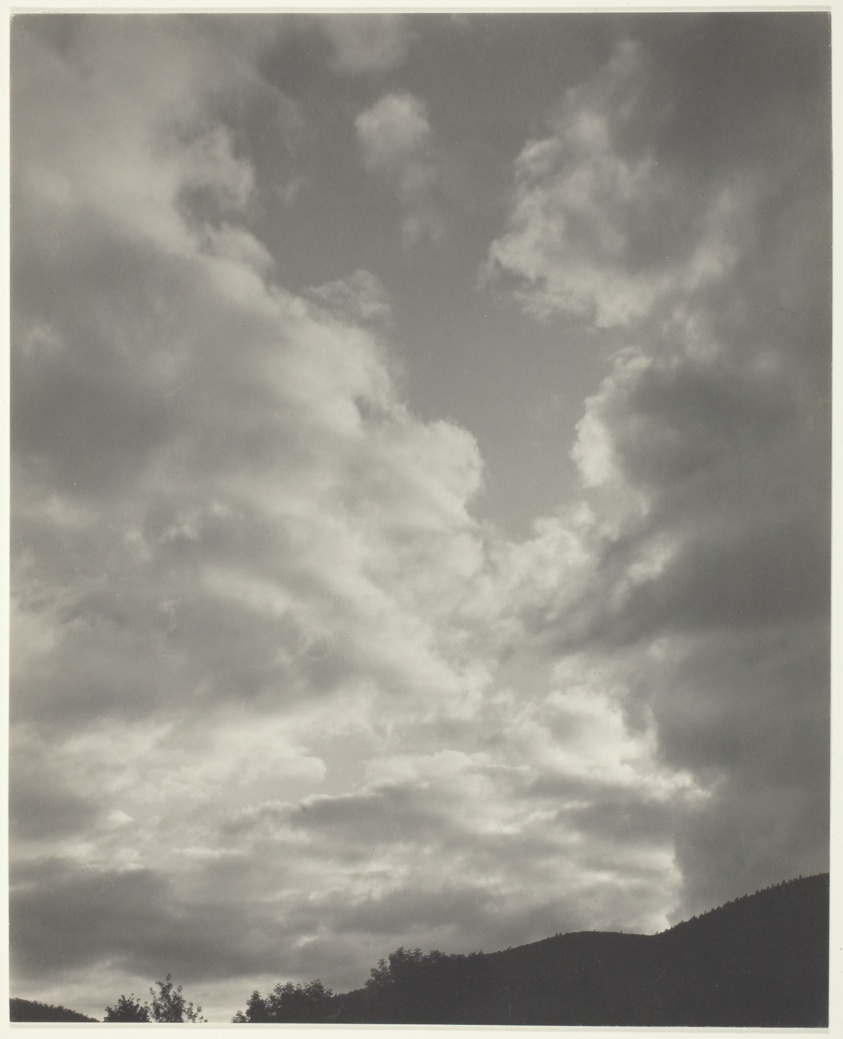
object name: Photograph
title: Music - A Sequence of Ten Cloud Photographs, No. II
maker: Alfred Stieglitz (American, 1864–1946)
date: 1922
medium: Gelatin silver print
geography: United States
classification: gelatin silver (developing-out-paper) pr; photographic process; photography; photograph